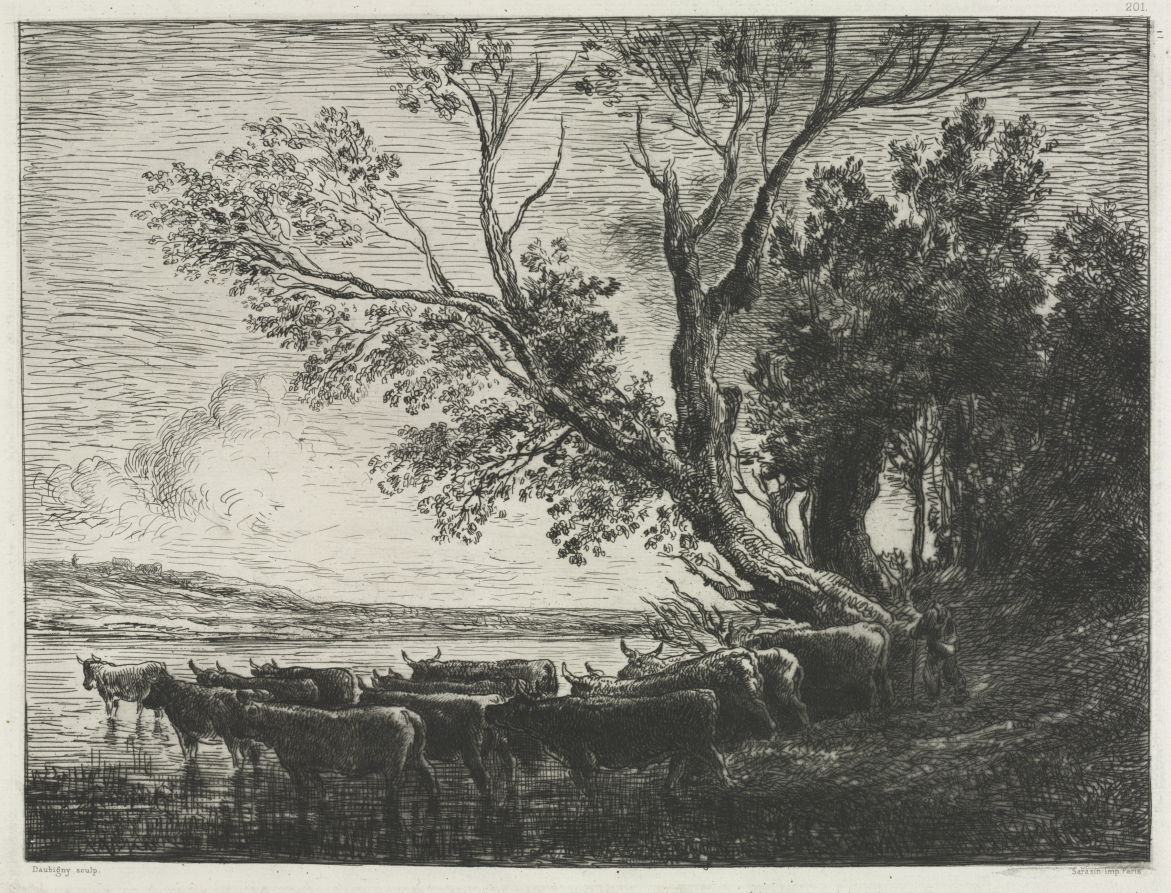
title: The Ford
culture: France, 19th century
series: Published in an album of the Société des Aquafortistes in 1866.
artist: Charles François Daubigny (French, 1817–1878)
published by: CADART & LUQUET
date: 1865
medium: etching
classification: Print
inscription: lower left, printed: Daubigny sculp.; lower right, printed: Sarazin Imp. Paris; lower center, printed: Le Gué; lower center, printed: Paris, Publié par Cadart & Luquet, Editeurs, 79, Rue Richelieu; upper right, printed: 201